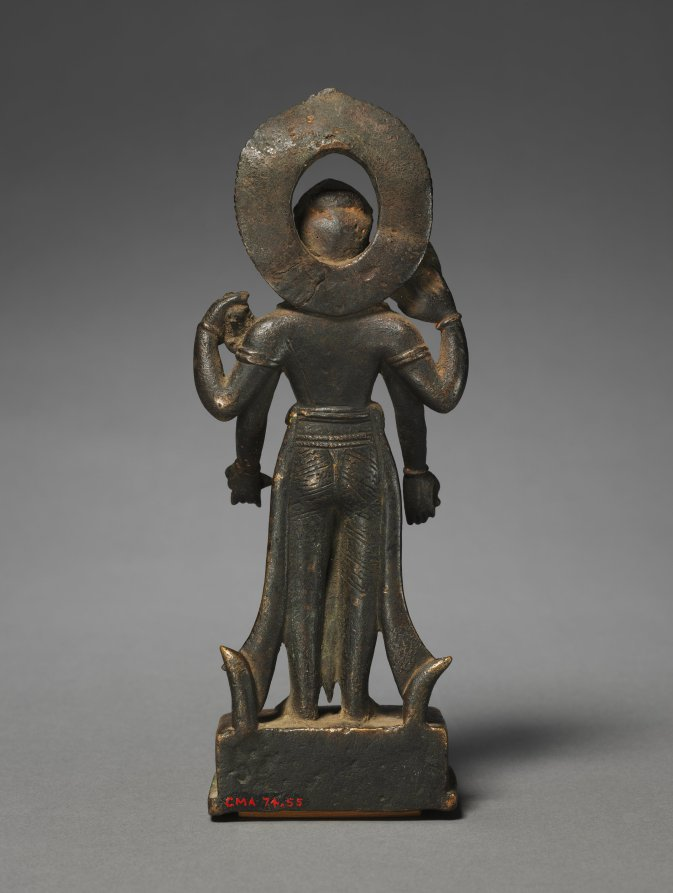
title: Vishnu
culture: Nepal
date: c. 800s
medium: bronze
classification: Sculpture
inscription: Pedestal inscribed